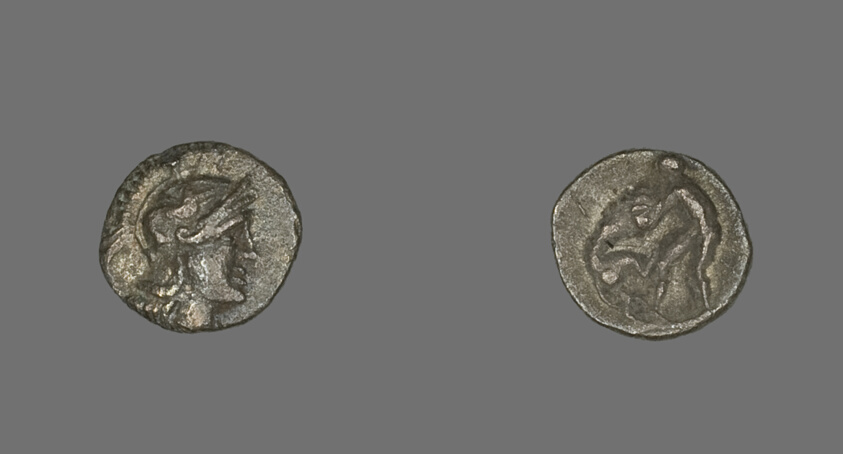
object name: Coin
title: Obol (Coin) Depicting the Goddess Athena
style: greek, ancient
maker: Greek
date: 334 (or earlier)-302 BCE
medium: Silver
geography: Taranto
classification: coin; ancient art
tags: Athena, mythological figures, lions, Heracles